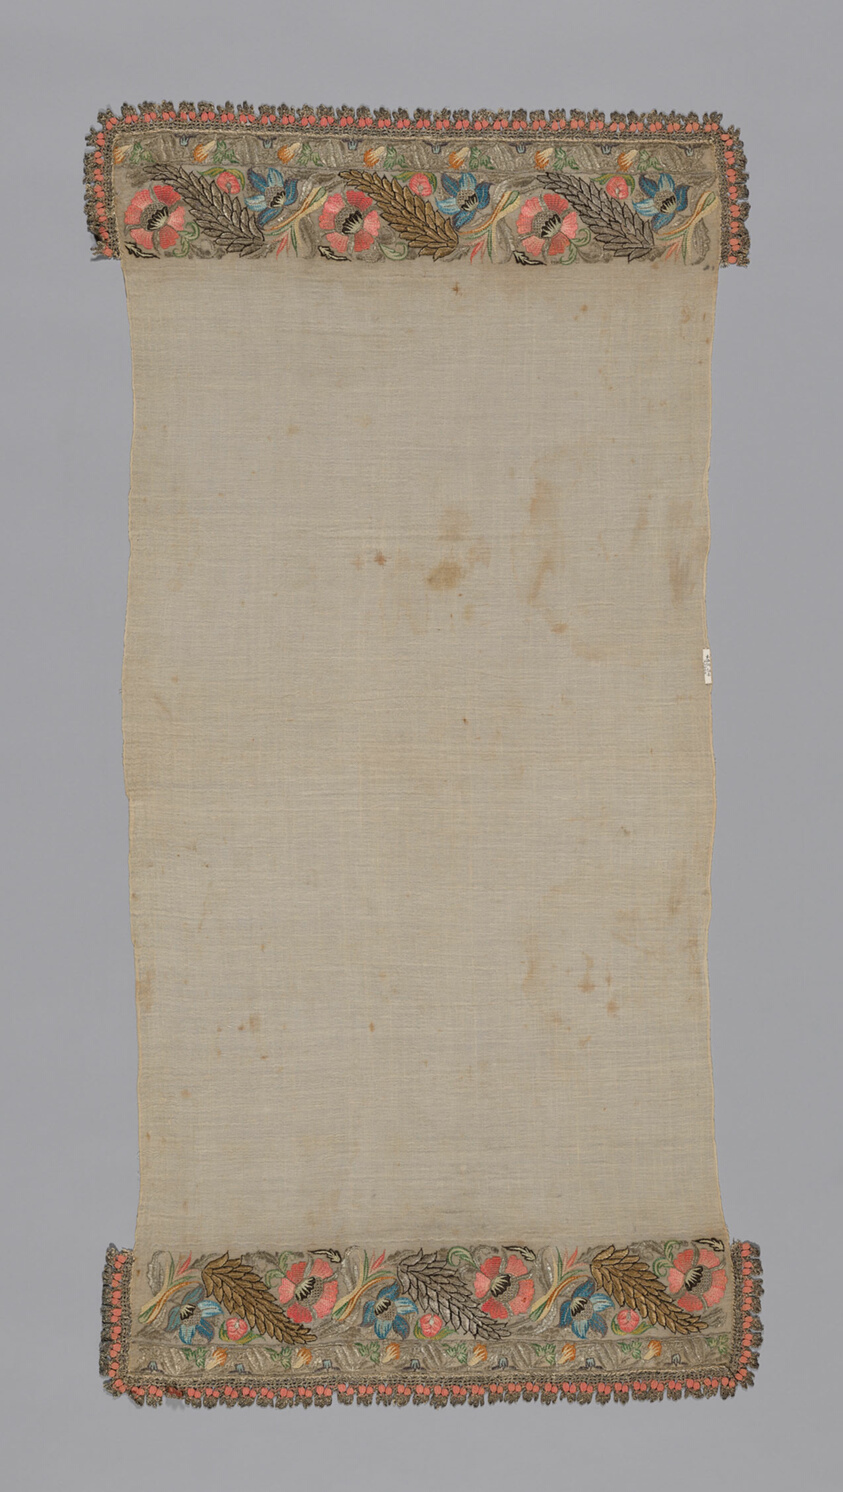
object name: Textile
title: Towel or Napkin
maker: Turkey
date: 19th century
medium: Towel, embroidered in flower and leaf design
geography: Turkey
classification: textile; needlework (visual works); weaving